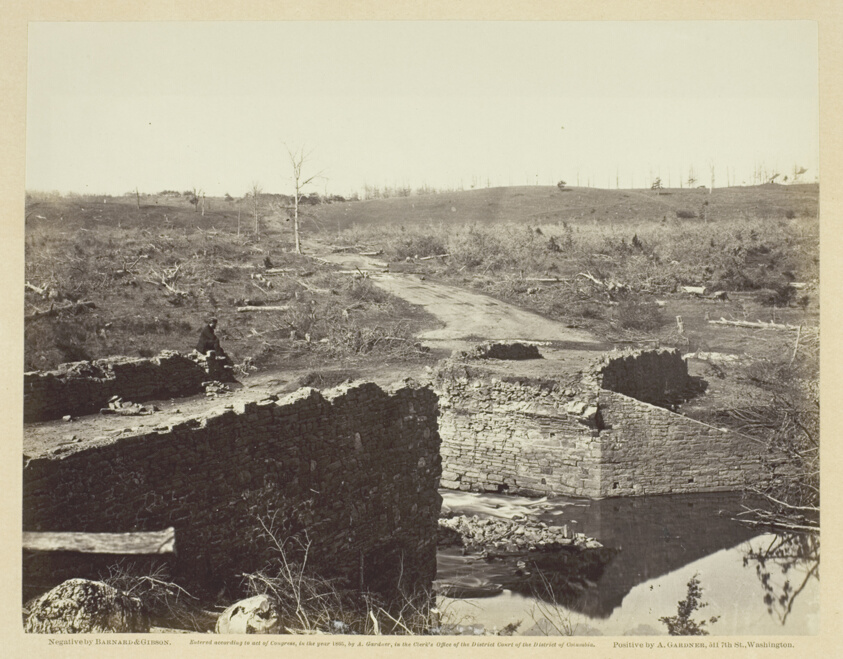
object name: Photograph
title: Ruins of Stone Bridge, Bull Run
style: 19th century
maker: Barnard and Gibson (American, active 19th century)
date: March 1862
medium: Albumen print, pl. 7 from the album "Gardner's Photographic Sketch Book of the War, vol. 1" (1866)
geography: United States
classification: photograph; albumen silver print; photography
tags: Collected by Hugh Edwards, Gardner's Photographic Sketch Book